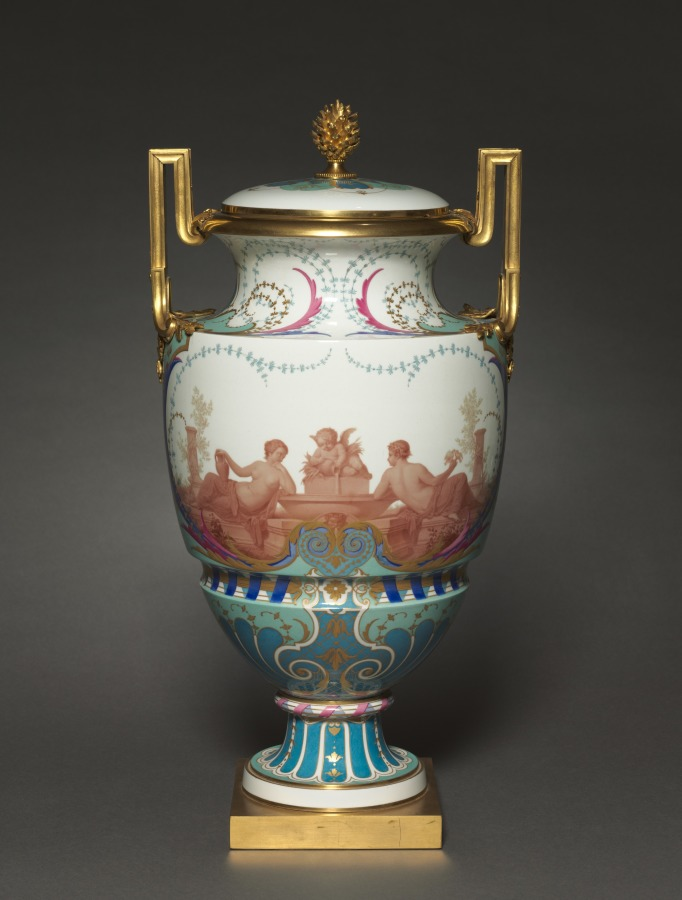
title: Vase Feuille d'Eau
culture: France, Sèvres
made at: Sèvres Porcelain Factory (French, est. 1756)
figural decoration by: Paul Marie Roussel (French, 1804–1877)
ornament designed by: Emile Renard (French)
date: 1858–62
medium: porcelain with gilt bronze mounts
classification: Ceramic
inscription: figural paintings signed obverse and reverse: "PMROUSSEL INV & PIN"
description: Feuille d'Eau means "waterleaf" and refers to the name given to the shape of this vase at the Sèvres factory. In English, waterleaf is the common name for a plant with bell-shaped flowers. The term is also applied to a stylized plant motif used in Graeco-Roman ornament. This vase was exhibited by the Sèvres firm at the International Exhibition held in London in 1862.